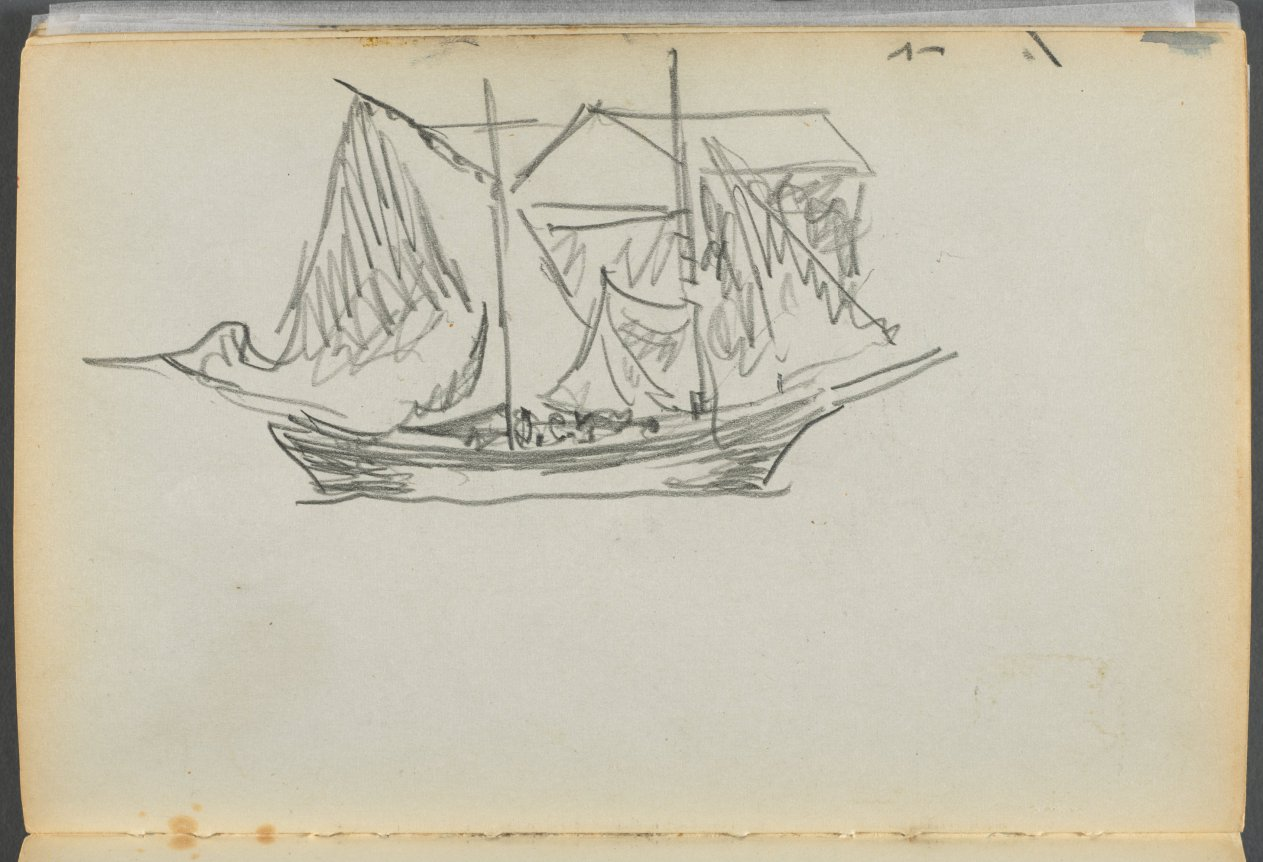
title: Sketchbook- The Granite Shore Hotel, Rockport, page 098: Sailboat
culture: America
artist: Maurice Prendergast (American, born Newfoundland [now Canada], 1858–1924)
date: 1905–10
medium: graphite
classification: Bound Volume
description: This sketchbook contains 72 pages of pencil drawings and 9 watercolors of Cape Ann. On the inside of the cover Prendergast wrote the address of the Granite Shore Hotel in Rockport, Massachusetts.